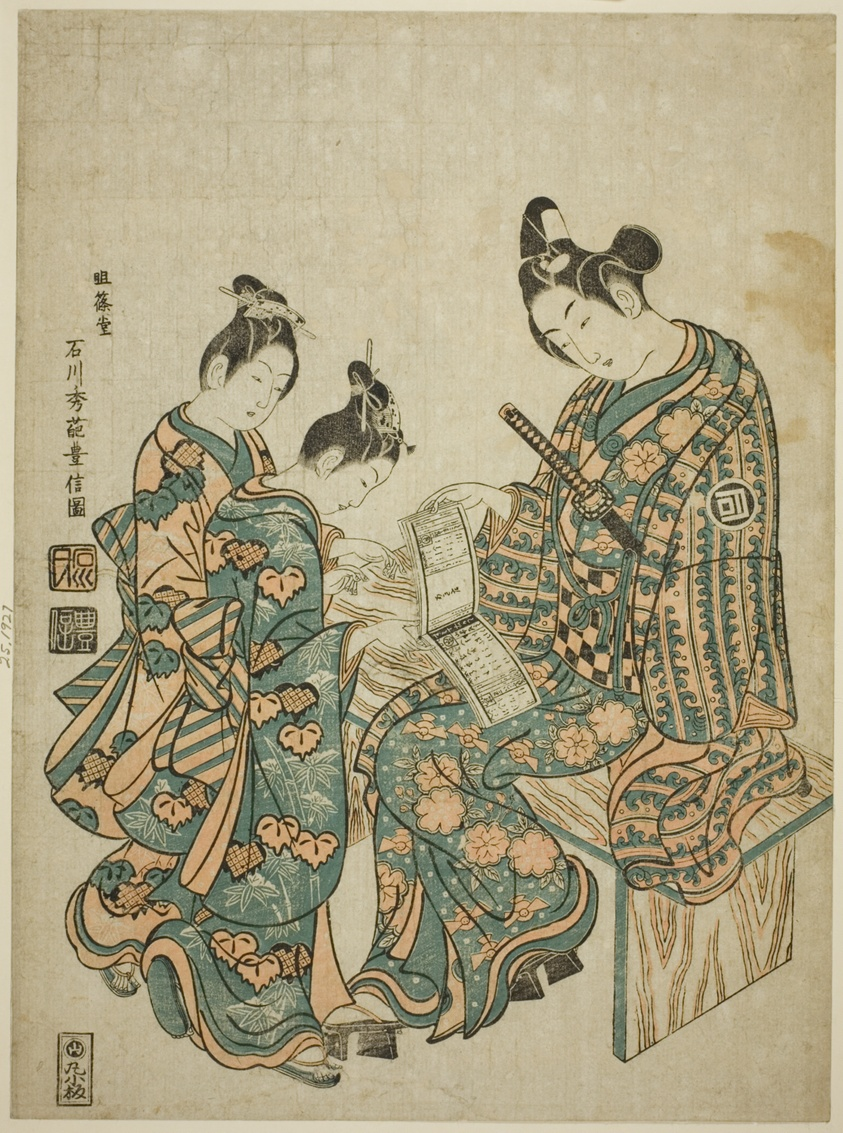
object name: Print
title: The Actor Sanogawa Ichimatsu I looking at a guidebook to the pleasure quarters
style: Japanese (culture or style)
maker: Ishikawa Toyonobu (Japanese, 1711-1785)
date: c. 1750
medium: Color woodblock print; oban, benizuri-e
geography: Japan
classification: woodblock print; print; asian art